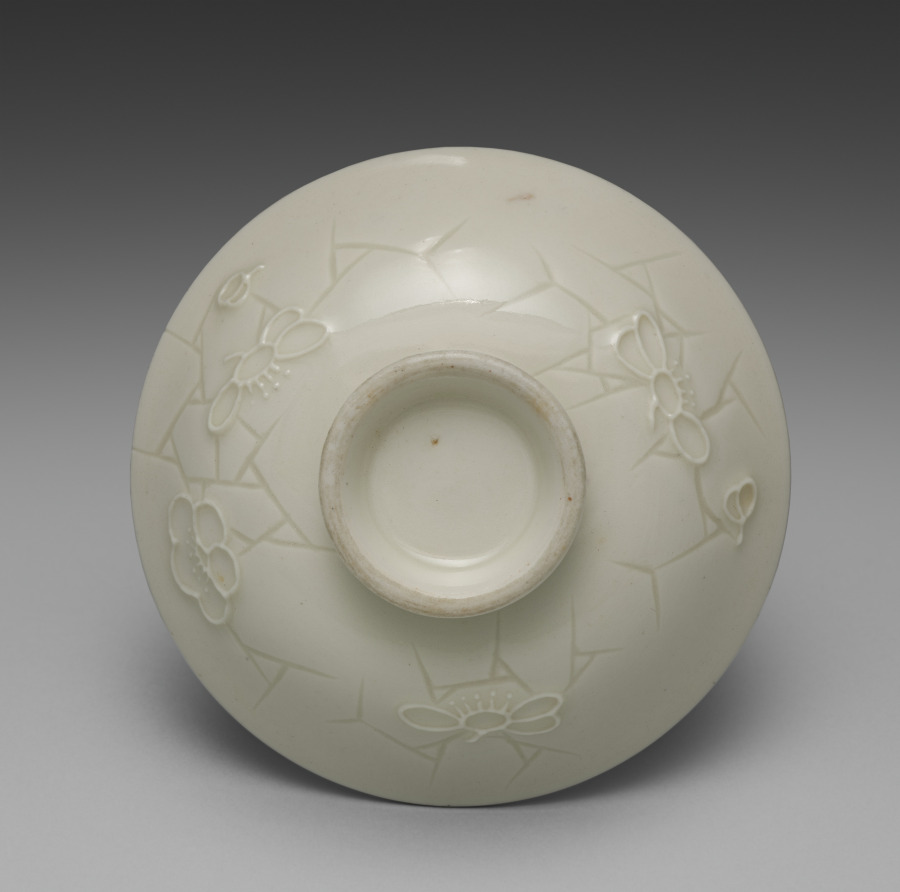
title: Cover for a Bowl from Dining Set with Plum Blossoms and Cracked-Ice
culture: Japan, Meiji period (1868–1912)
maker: Seifū Yohei II (Japanese, 1844–1878)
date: c. 1875–78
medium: Porcelain with molded designs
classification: Ceramic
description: Each item in this set has a delicate low-relief design of flowering plum branches over scattered, intersecting lines meant to resemble the cracked-ice surface of a frozen body of water and is signed on the base in gold pigment. While Yohei II produced many fine works in underglaze blue, like those produced by Kiyomizu Shichibei, he also made works in quite different styles later in his career, from the early 1870 s. In 1873, he was appointed purveyor to the Industrial Center of Kyoto Prefecture, a designation associated with Kyoto’s efforts to reach an international market through the port of Kobe; and from 1875 until his death, he was involved in national-level projects to present Japanese ceramics across the world. It was during this period that Yohei III was apprenticed to Yohei II, and it has been suggested that this set may in fact be an early example of Yohei III’s work, which he signed with his teacher’s name. Decorated with flowers resembling Japanese textile motifs, the set calls to mind the design of Yohei II’s pair of vases with plum blossoms in the Victoria and Albert Museum. Here, the elaborate trees created for a formal public exhibition setting have been translated into the approachable blossoms of the genteel domestic environment. While the designs are consistent across the pieces, each raised flower petal and pistil and each incised line in the ice was done by hand, so the cups, bowls, and dishes are similar yet unique. The bottoms of two boxes once identified the set’s owner, but the information has been deliberately obscured with black ink. However, inscriptions still visible appear to indicate two occasions, once at the end of July 1886 , and once again in June 1916 , when parts of the set were requested from Hokura in Niigata Prefecture. The location corresponds to a neighborhood in the present-day city of Jōetsu. The surname Tsuji 辻 also appears on a paper tag affixed to one of the box cloths. Future research may possibly reveal more about their provenance. A vase by Yohei III in a private collection combines the formal grandeur of the Yohei II vases in the Victoria and Albert Museum with the gentler design of this dining set, placing flowering plum trees against soft, scalloped-edge clouds resembling those in golden screens.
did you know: The dining wares have a creamy white coloration that the four boxes containing them identify as Korean in style.